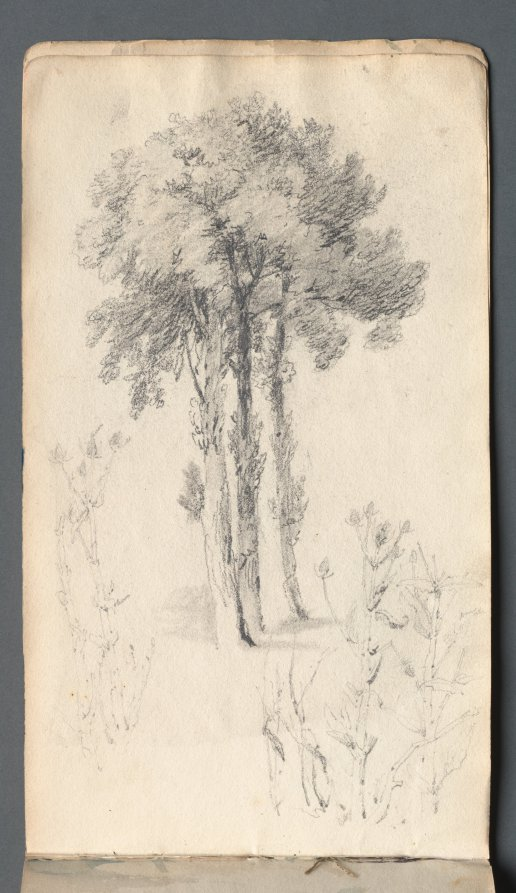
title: Sketchbook: Tree Study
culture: England, 19th century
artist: Samuel Prout (British, 1783–1852)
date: 1814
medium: graphite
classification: Bound Volume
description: John Ruskin (also in this gallery) admired Prout’s strength as a draftsman. Like the topographical watercolorists of the 18th century, Prout emphasized form over color in his watercolors, as is evident in the monochromatic, delicate English views in this sketchbook.